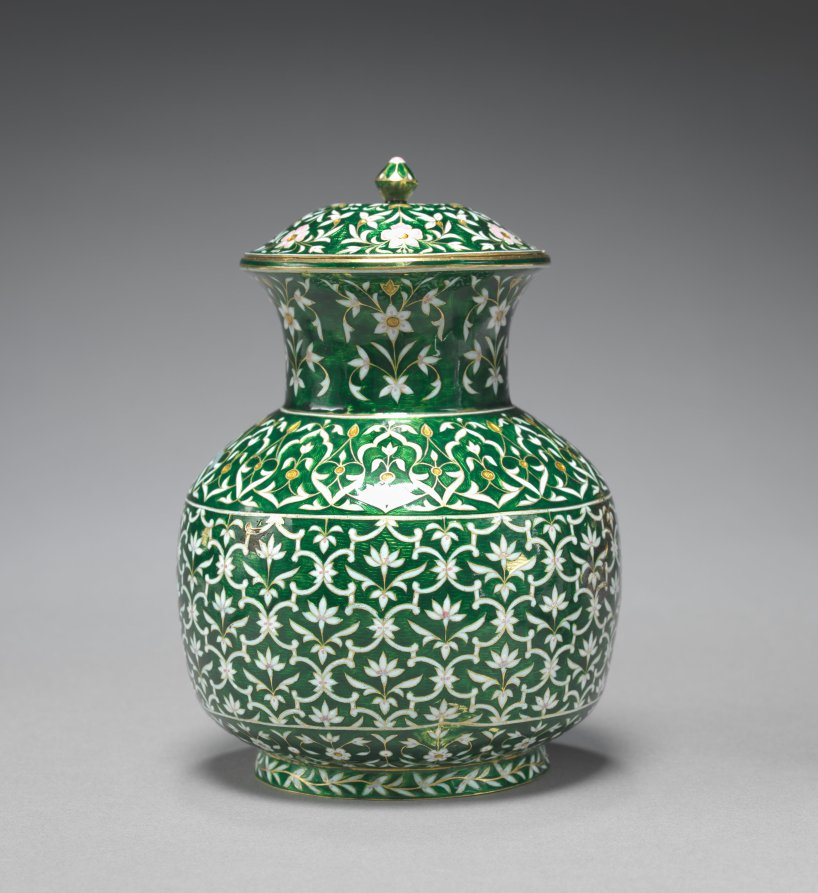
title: Lota: Covered Jar on Narrow Foot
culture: India, Jaipur, late 17th-early 18th Century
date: c. 1700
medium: cloisonne enamel on gold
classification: Enamel